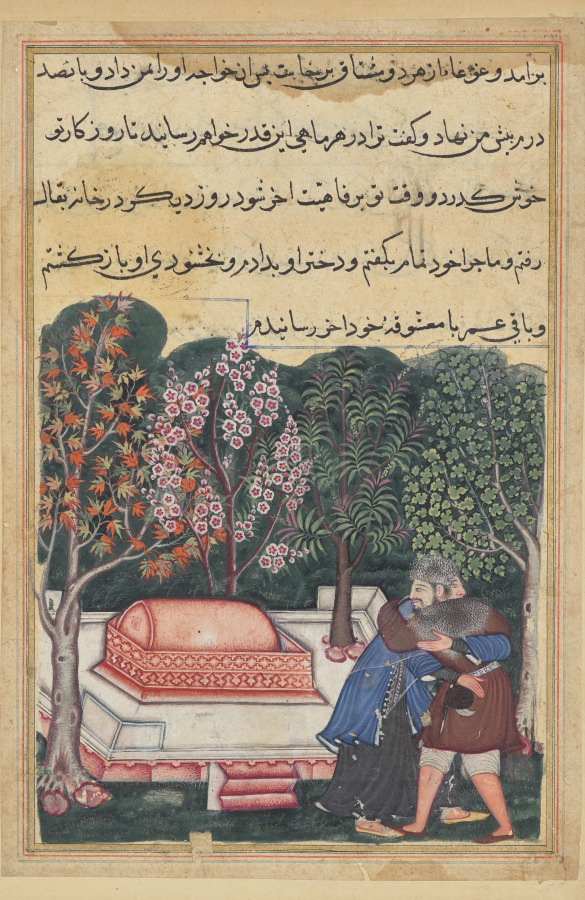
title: The young man of Baghdad reunited with his slave-girl, from a Tuti-nama (Tales of a Parrot): Forty-eighth Night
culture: Mughal India, court of Akbar (reigned 1556–1605)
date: c. 1560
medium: gum tempera, ink, and gold on paper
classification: Painting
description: After the young man was left behind by his merchant ship, his lover, the slave girl, believed that he was dead. She erected a monument in his honor and donned black clothes of mourning, yet fate brought them together again. Here, the two lovers embrace in front of the young man’s empty grave.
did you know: The space designated for the sky has not been painted.